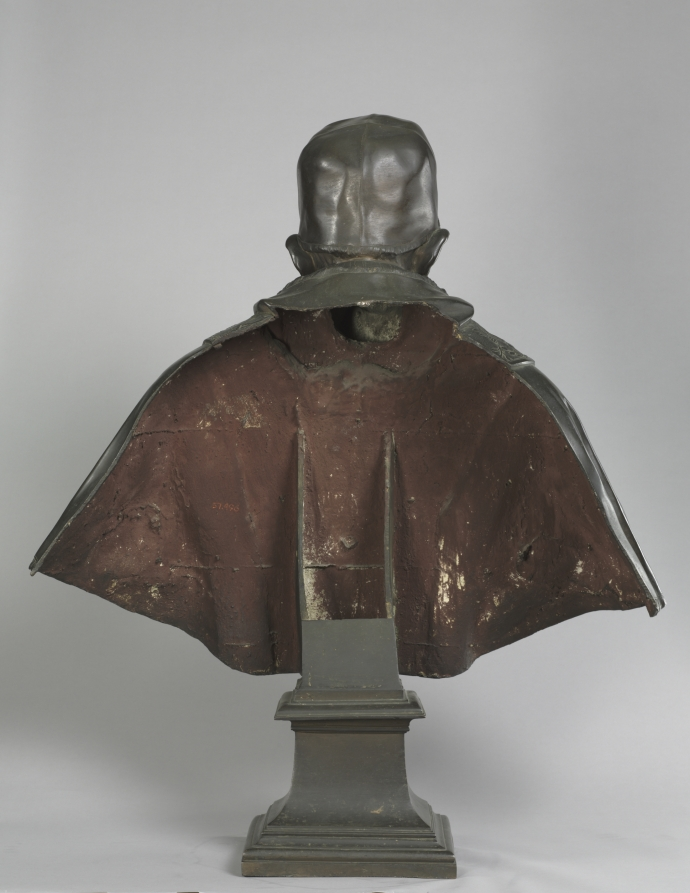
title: Portrait of Pope Innocent X Pamphili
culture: Italy, 17th century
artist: Alessandro Algardi (Italian, 1598–1654)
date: designed 1647–48; cast 1650–1700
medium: bronze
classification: Sculpture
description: Innocent X (Giovanni Battista Pamphili) was pope from 1644 until his death in 1655. Although he was not very interested in the visual arts, he followed tradition and gave several papal commissions for artistic projects. Algardi was the sculptor most frequently called upon by Innocent X. This sensitive portrait captures many details of the pope's costume as well as his intelligent, quiet face.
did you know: The pope's stole features Pamphili family emblems: fleur-de-lis and doves encircled by olive leaves.